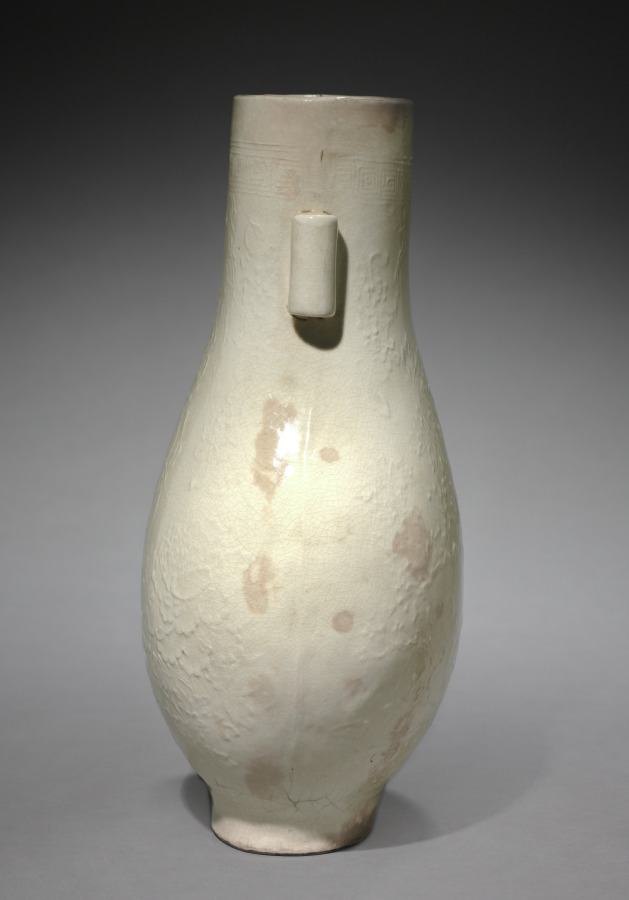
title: Vase: Ding ware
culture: China, Ming dynasty (1368–1644)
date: 1368–1644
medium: porcelain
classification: Ceramic